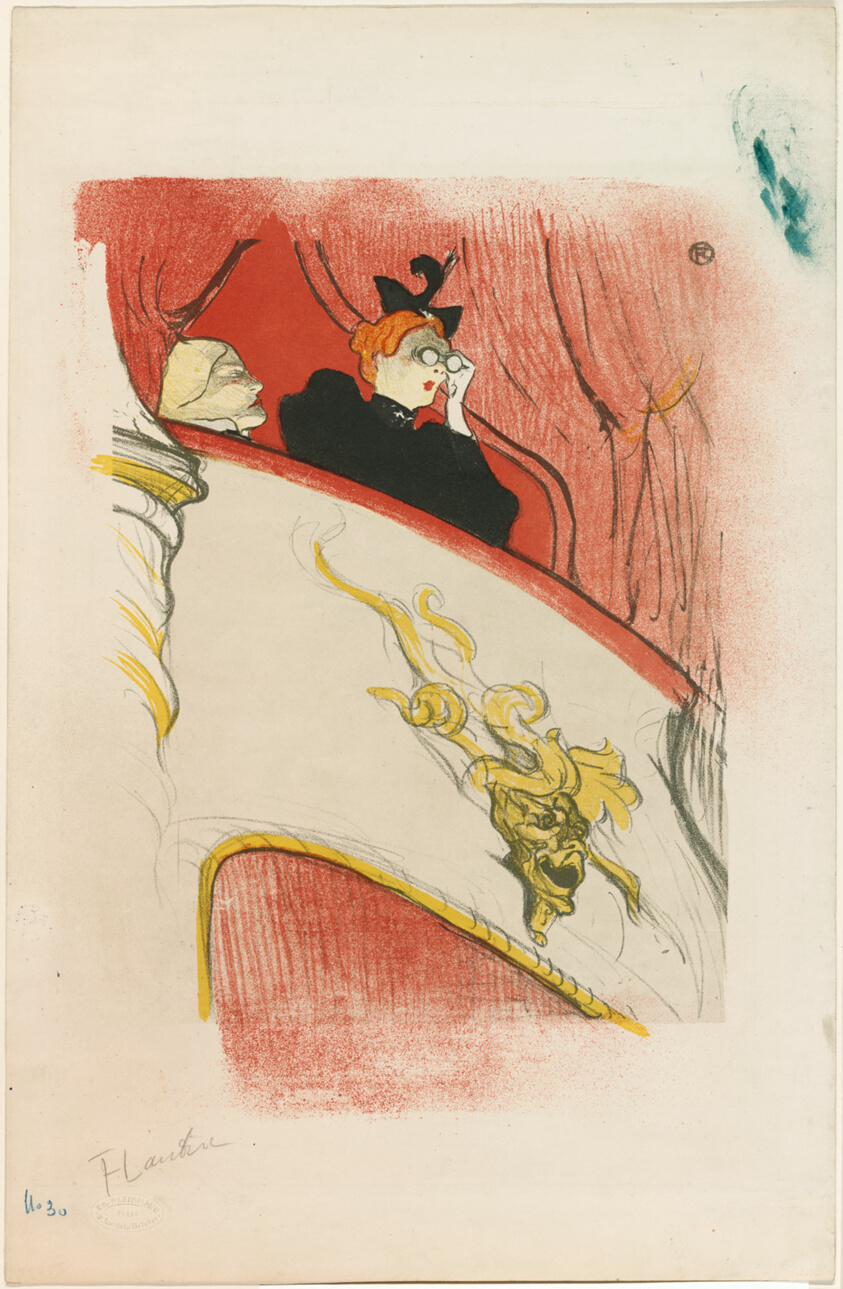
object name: Print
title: The Loge with the Gilded Mask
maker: Henri de Toulouse-Lautrec (French, 1864-1901)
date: 1893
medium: Color lithograph on cream wove paper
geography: France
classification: lithograph; print; prints and drawing